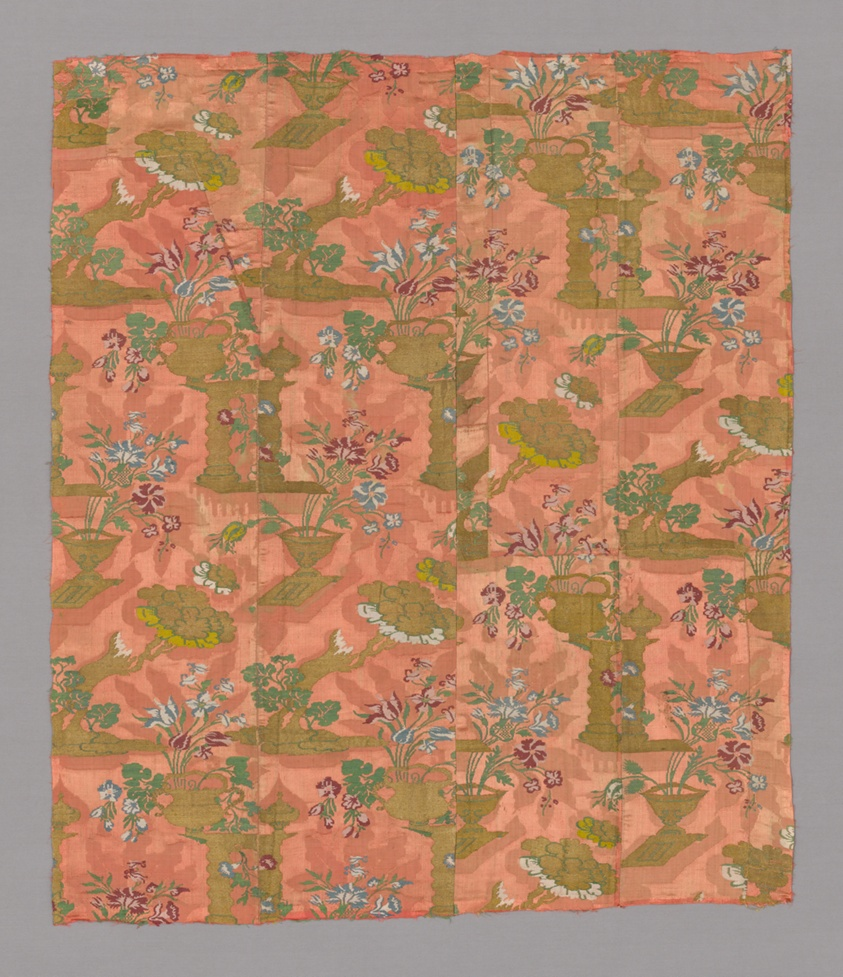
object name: Textile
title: Panel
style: "bizarre" style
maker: France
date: c. 1707/08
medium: Silk and gilt-metal strips, warp-float faced 7:1 satin weave with supplementary brocading wefts and self-patterned by areas of weft-float faced broken combined twill weave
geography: France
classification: textile; weaving